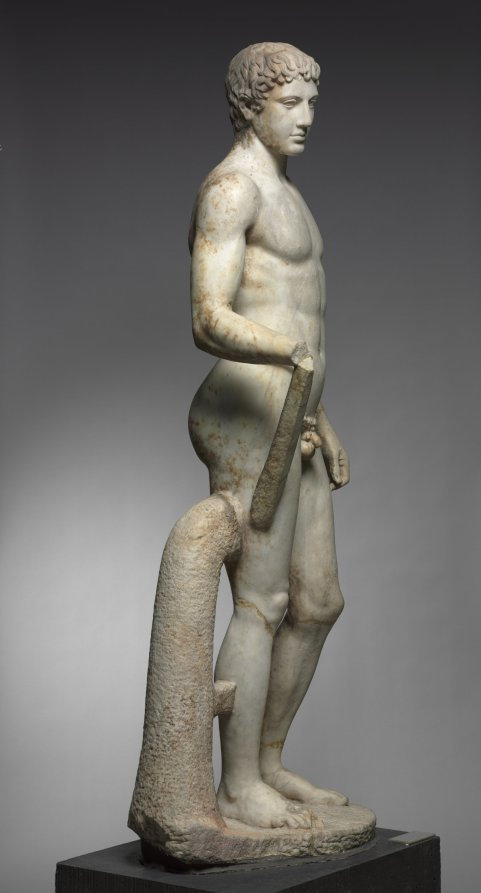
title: Statue of an Athlete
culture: Italy, Roman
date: 1–100 CE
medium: marble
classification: Sculpture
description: This idealized athlete recalls Greek sculptural types invented and popularized during the 400s BC. Large-scale athletes and other sculptures like this were originally created by famous artists as sanctuary dedications. Centuries later, they were widely copied and adapted by Roman sculptors, whose clients sought their own versions of earlier masterpieces. Working in marble rather than bronze, these sculptors added certain elements for stability, such as the struts and the large tree trunk beside the right leg here. Sculptures like this one are profoundly complex, made by and for Romans but descended from Greek ancestors.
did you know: For many years, this sculpture stood in the rotunda of the Cleveland Museum of Art.